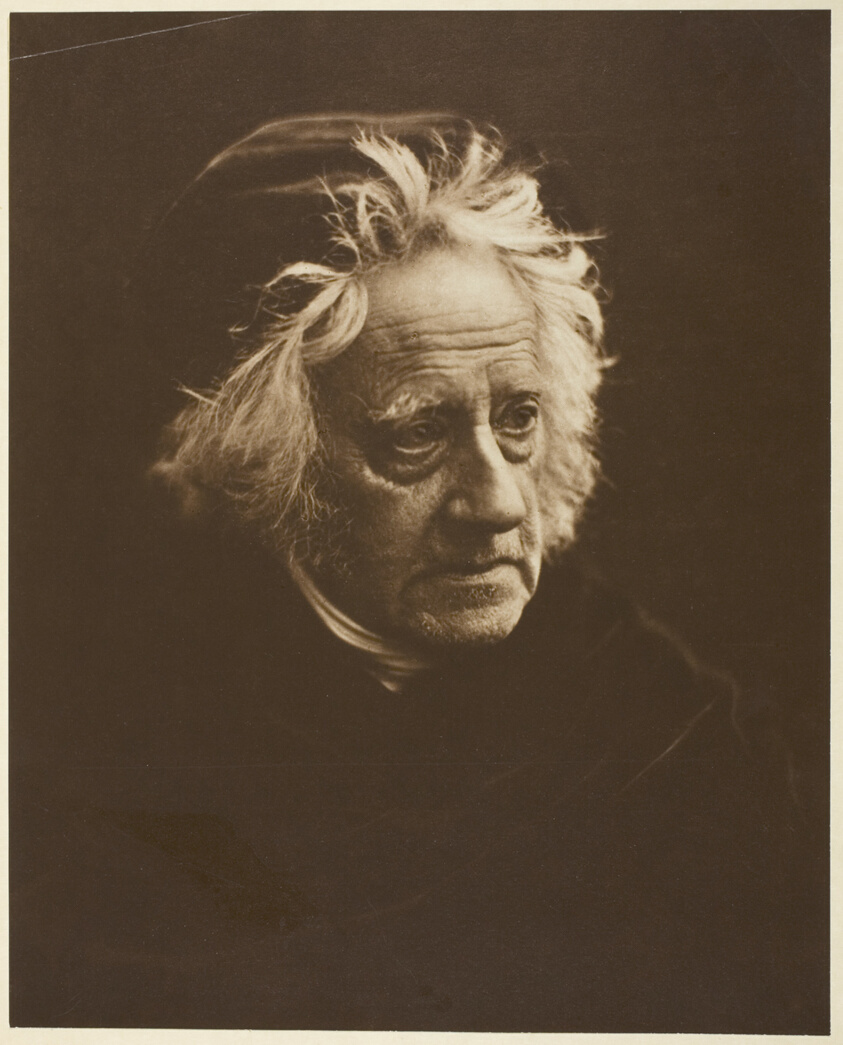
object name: Photograph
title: Sir John Herschel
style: 19th century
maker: Julia Margaret Cameron (English, 1815–1879)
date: 1867, printed 1875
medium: Carbon print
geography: England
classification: carbon print; pigment process; photographic process; photography; photograph